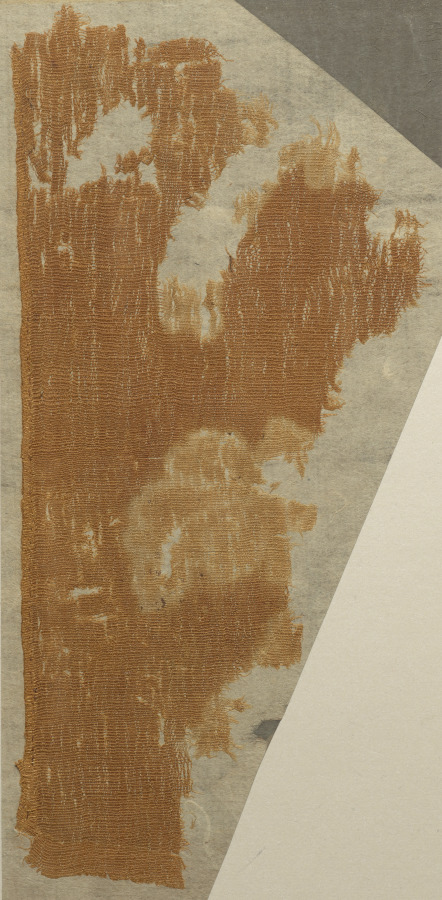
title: Fragment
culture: China, Tang dynasty (618–907) or Japan, Nara period (710–794)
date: 700s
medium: gauze printed; silk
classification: Textile